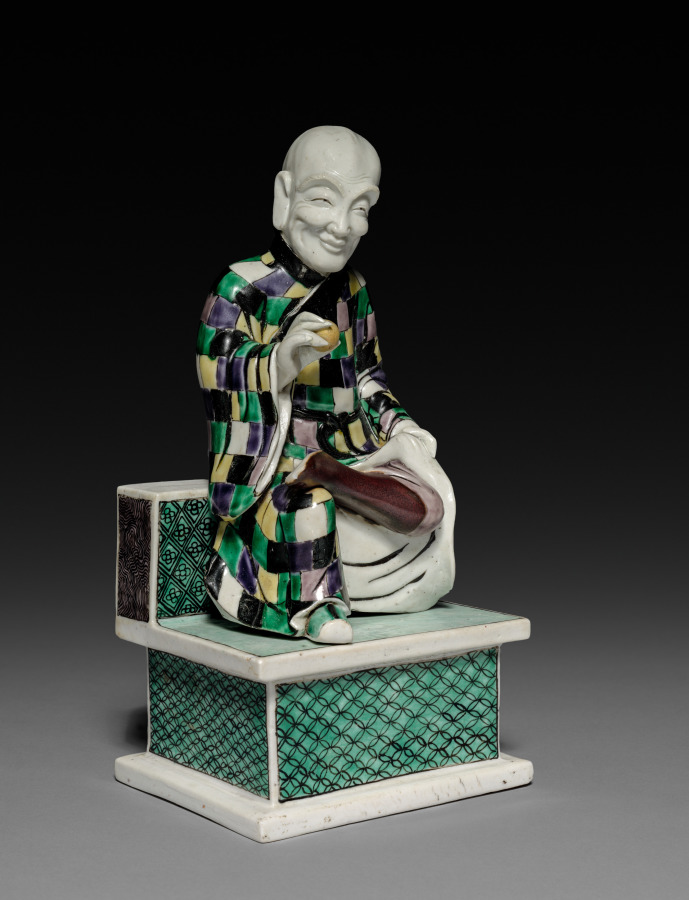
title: Lohan (Arhat) Holding a Peach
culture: China, Jiangxi province, Jingdezhen kilns, Qing dynasty (1644–1911), Kangxi reign (1662–1722)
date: 1662–1722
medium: porcelain with famille verte overglaze enamel decoration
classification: Ceramic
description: Lohan are disciples of Buddha with supernatural powers and eccentric behaviors. This lohan is holding the peach of longevity (shoutao), while its mate is holding the fu-dog, symbolizing good luck. With carefree smiles and playful gestures, these two figures embody a humorous attitude and a detachment from worldly affairs. This pair of porcelain figures was perhaps part of a house altar set or a decorative item in a household.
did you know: This lohan with a bald head wears a monk’s robe made of patches.